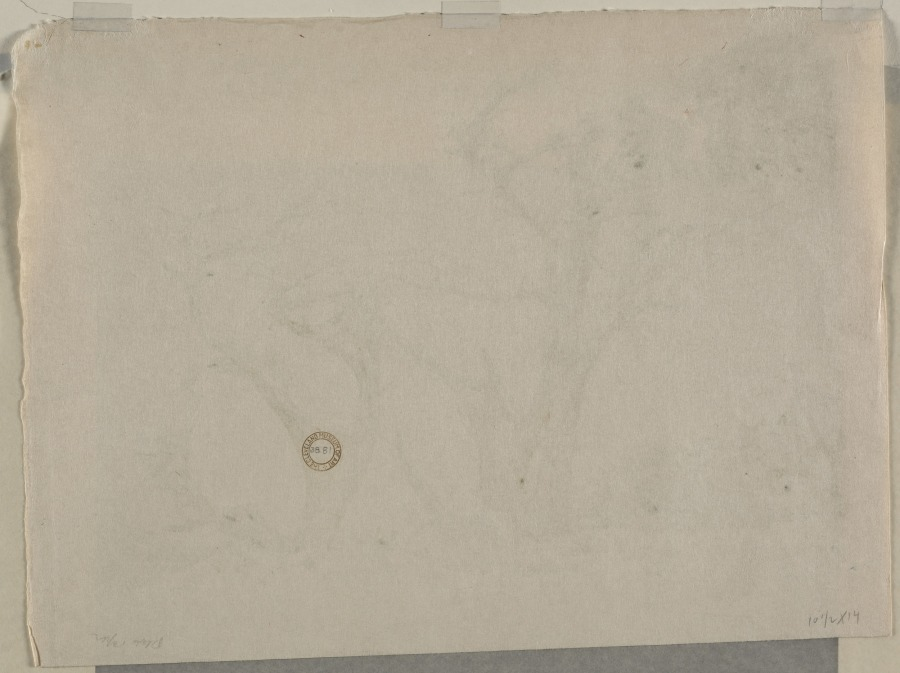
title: Monterey Cypress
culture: America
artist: Ernest Haskell (American, 1876–1925)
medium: monotype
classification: Print